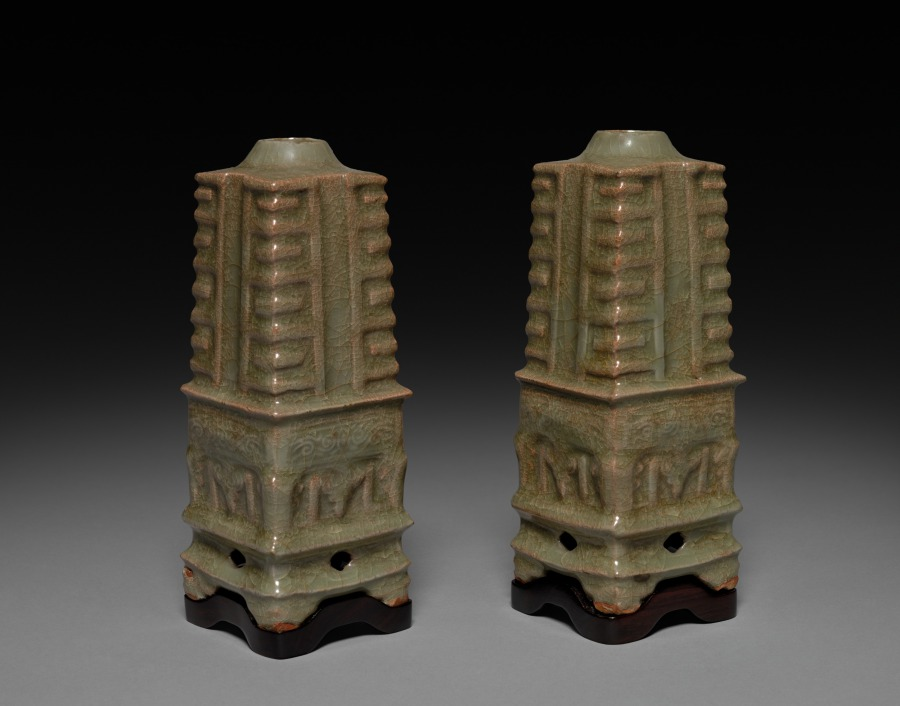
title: Pair of Vases in Shape of Cong: Southern Celadon Ware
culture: China, Zhejiang province, Yuan dynasty (1271-1368)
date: 1271–1368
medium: glazed buff stoneware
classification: Ceramic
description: This pair of cong-shaped vases was inspired by Neolithic jades of the Liangzhu culture. They reflect the Song scholar’s interest in antiquity and archaeology.